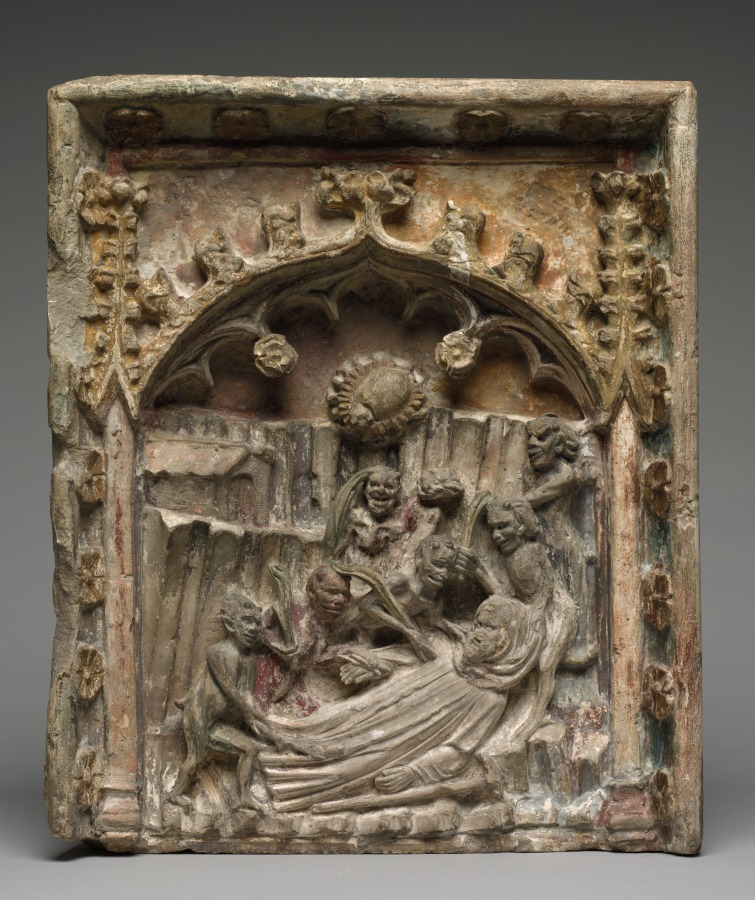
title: Temptation of Saint Anthony of Egypt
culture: France, c. 15th century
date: c. 1400s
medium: stone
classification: Sculpture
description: Saint Anthony (AD 251–356) was a Christian monk from Egypt, revered since his death as a saint. Many of his tales are conveyed in the Golden Legend, a classic work of the Middle Ages containing lively tales of saints’ miracles written in a simple style for a wide audience. This scene illustrates the supernatural temptation faced by Saint Anthony during his retreat to the Egyptian desert. The saint is being tempted by hideous demons, which he resisted.